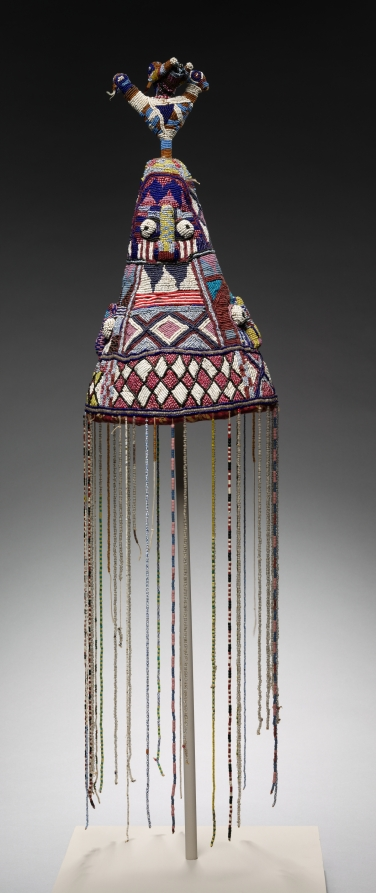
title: Crown (adéńlá)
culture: Africa, West Africa, Nigeria, Yorùbá-style maker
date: 1900s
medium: Cloth (probably cotton and wool), glass beads, reeds, cardboard, wood, plant fiber, cotton, and quills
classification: Garment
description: The most important of all regalia, topped with the "royal bird" Okin, this headdress connects the king to Oduduwa, the mythical founder of the Yoruba. The veil of beaded strings masks the identity of the wearer and protects his subjects from the supernatural powers that radiate from his face. The crown also signifies the "inner head" of the king, the locus of an awesome life force called ase.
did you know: No one––not even the king who wears it––is allowed to look inside this crown, as that's where it is most powerful.